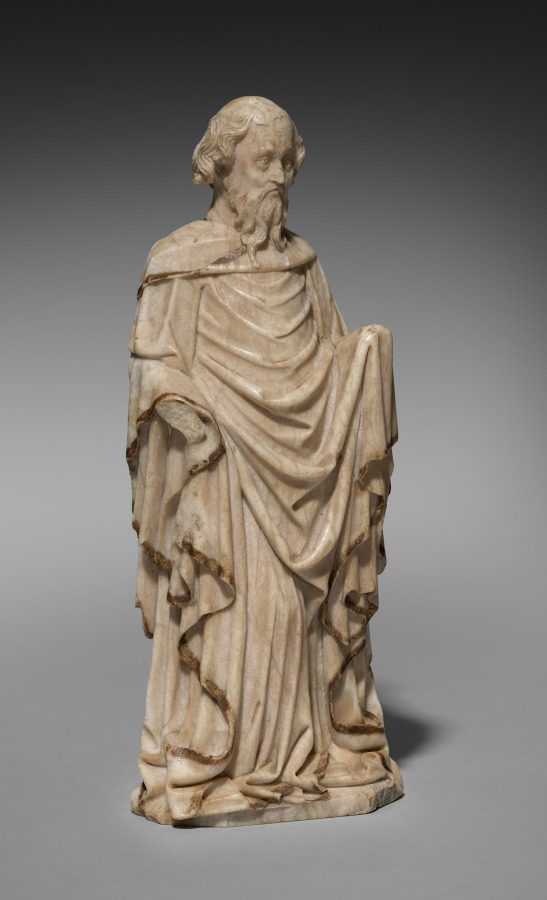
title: Standing Apostle (Saint Paul?)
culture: Southern Netherlands or Northern France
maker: Master of the Saint-Omer Apostles (Southern Netherlandish, active Bruges?)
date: c. 1430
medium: Alabaster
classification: Sculpture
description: This sculpture comes from an altarpiece in the cathedral of Saint Omer in northern France. Four other figures have been preserved there, and possibly one at the Metropolitan Museum in New York. The workshop was probably located in Bruges, in what is now Belgium. Sculpture was the leading art genre at that time. The specialized workshops obtained the stone alabaster from distant quarries, in this case from the area of Würzburg in Bavaria (Germany), to form it intricately and deliver it to customers in almost all of Europe.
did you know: Alabaster is very soft; after 20 minutes of treatment with water the surface will dissolve.